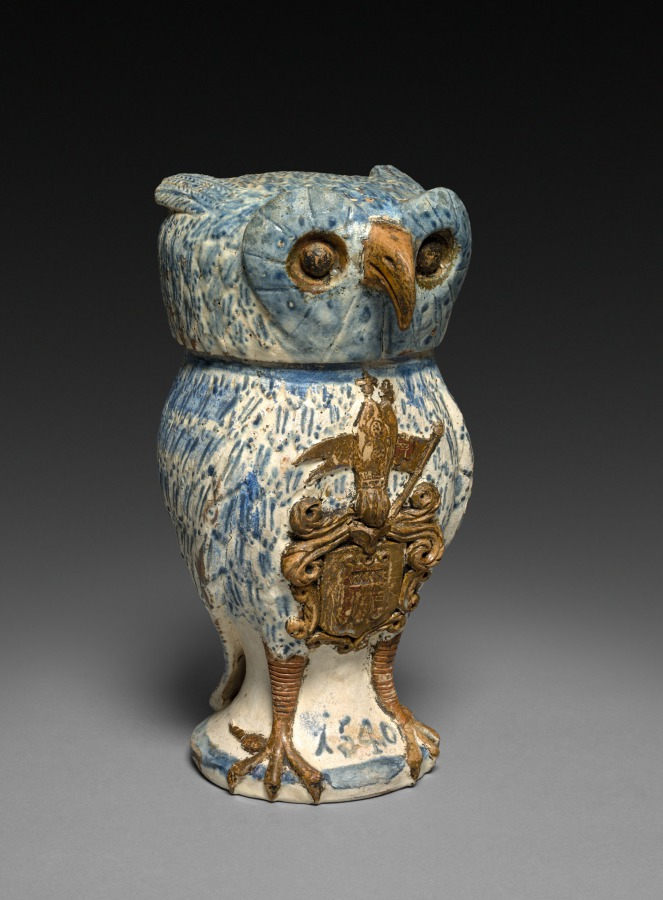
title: Owl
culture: Southern Germany, 16th century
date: 1540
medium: faience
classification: Ceramic